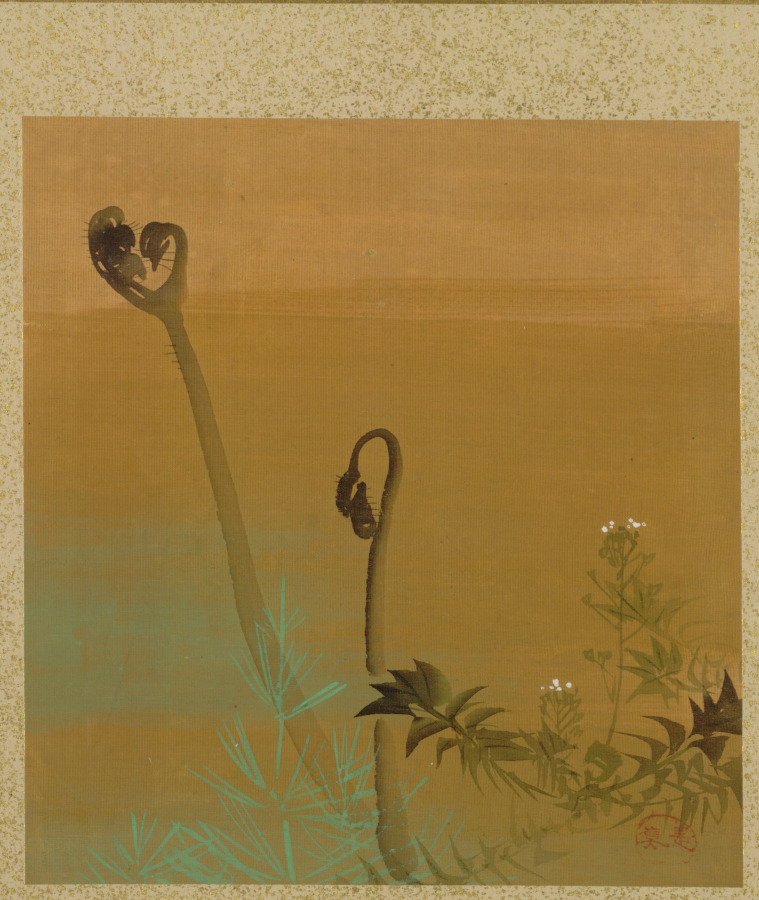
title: New Ferns from Album of Paintings by the Venerable Zeshin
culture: Japan, Edo period (1615–1868)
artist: Shibata Zeshin (Japanese, 1807–1891)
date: 1847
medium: Leaf in accordion-style album; ink, color, and gold on silk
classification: Bound Volume